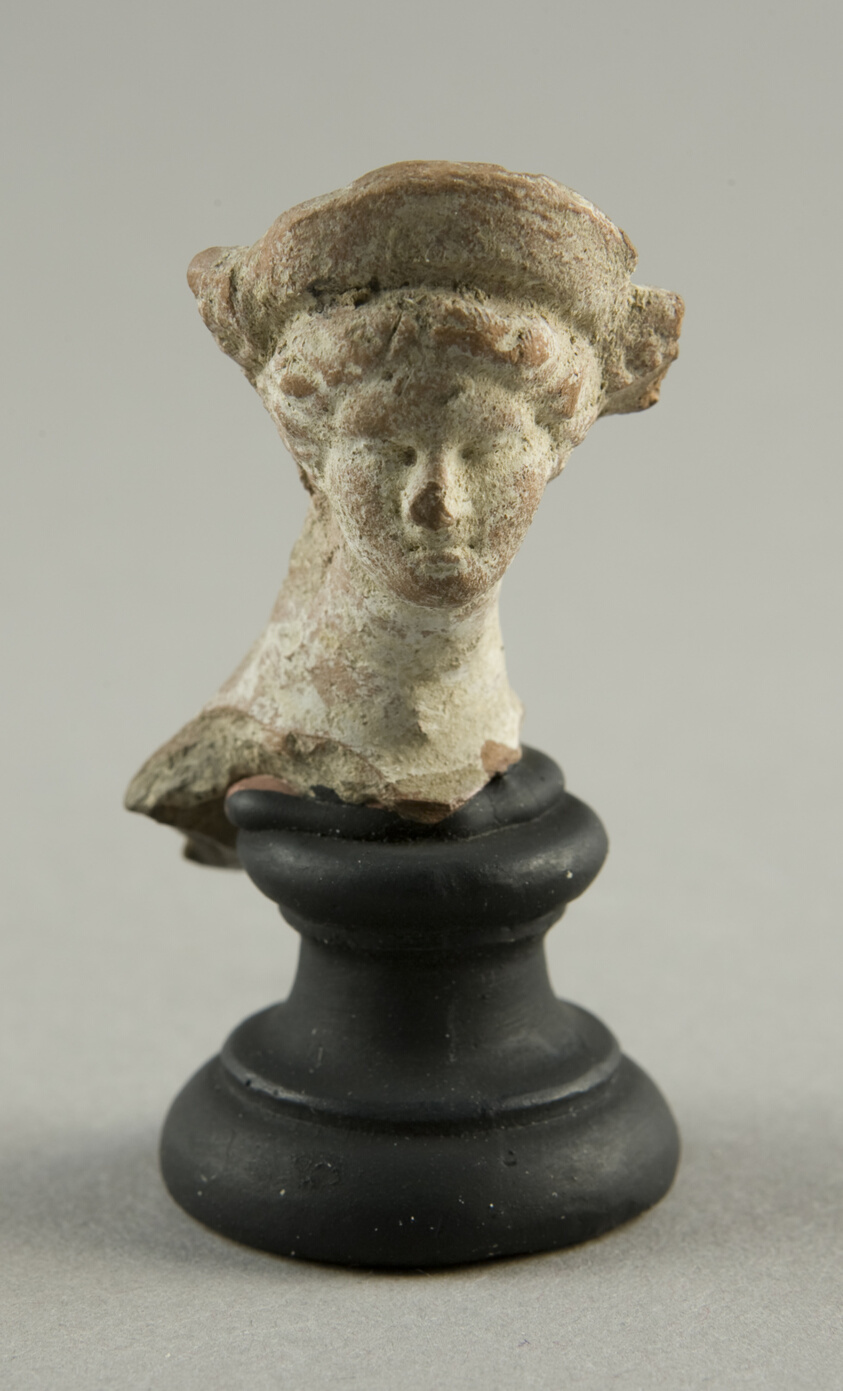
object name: Sculpture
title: Head of a Woman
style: greek, ancient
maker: Greek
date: 4th-3rd century BCE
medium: terracotta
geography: Greece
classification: earthenware; ceramics; sculpture; ancient art